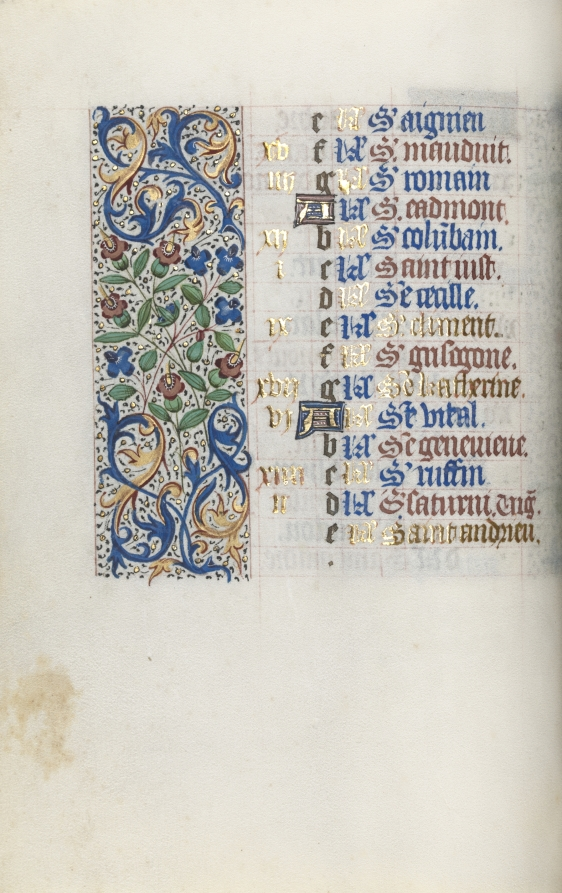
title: Book of Hours (Use of Rouen): fol. 11v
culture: France, Rouen, 15th century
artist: Master of the Geneva Latini (French, active Rouen, 1460–80)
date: c. 1470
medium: ink, tempera, and gold on vellum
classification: Bound Volume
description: In the late 1400s and early 1500s Rouen was an established and important center of book production. The city’s cathedral had a wealthy chapter that spent large sums of money to commission books and to maintain its extensive library. The stationers and booksellers would have likely been concentrated in or near the cathedral precinct. This artist, named after a manuscript now in Geneva, was Rouen’s principal illuminator during the second half of the 1400s.